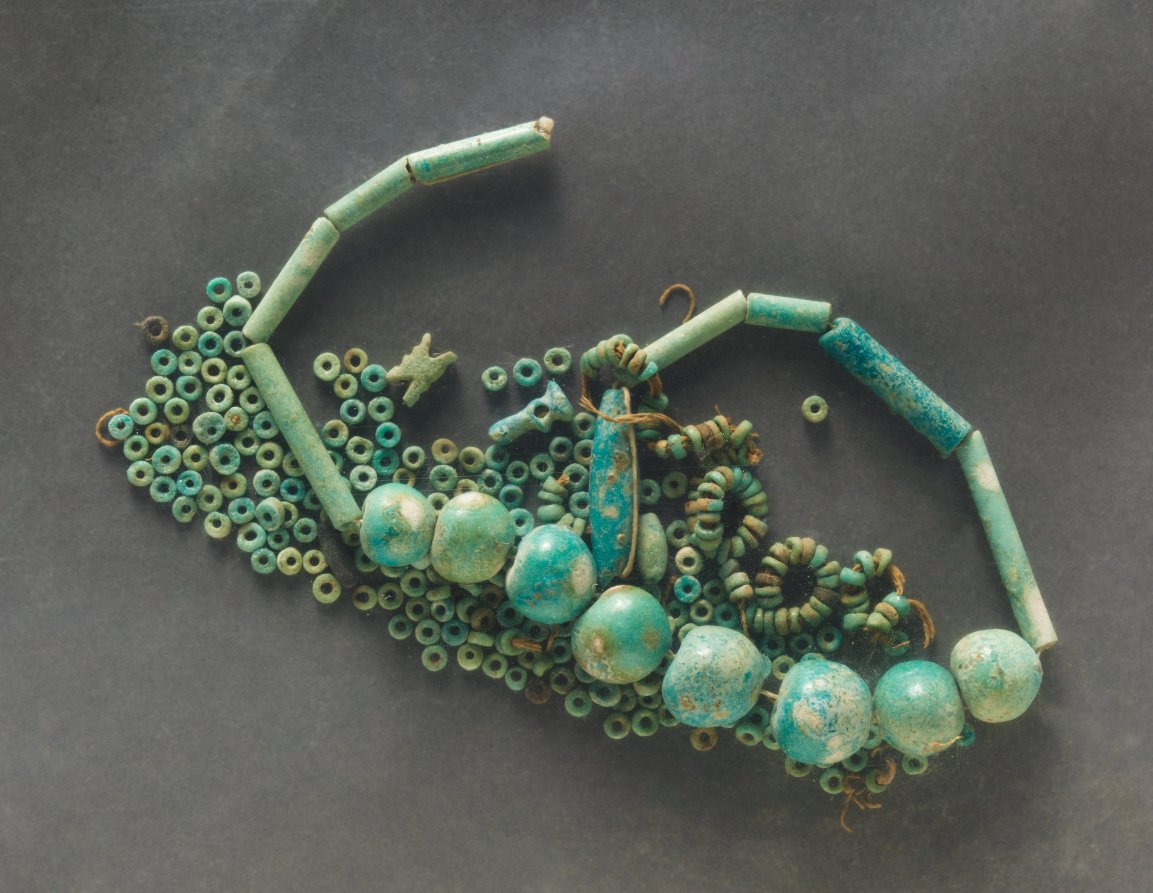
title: String of Beads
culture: Egypt, Middle Kingdom (2040–1648 BCE)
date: 2040–1648 BCE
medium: faience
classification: Jewelry